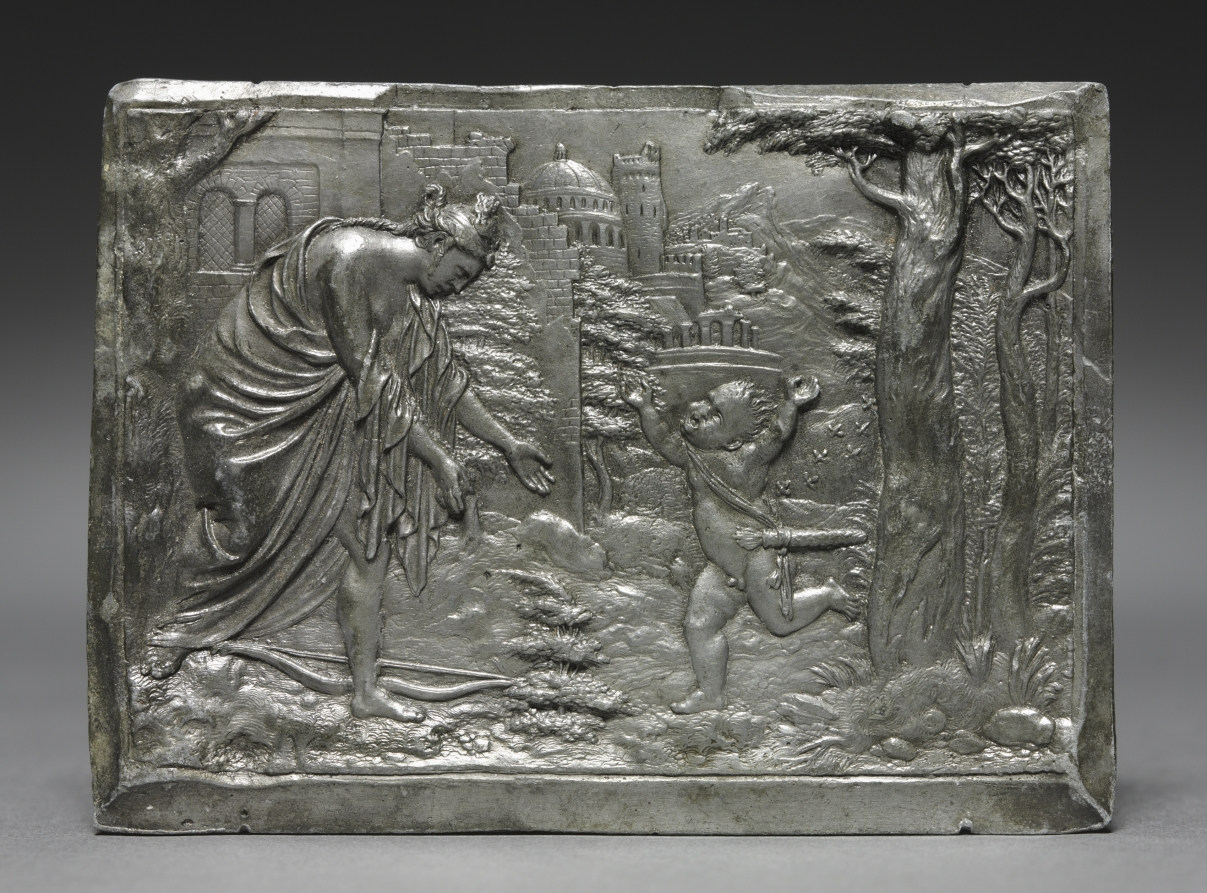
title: Cupid Complaining to Venus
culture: Germany, Nuremberg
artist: Peter Flötner (German, 1485–1546)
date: c. 1540–46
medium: lead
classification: Sculpture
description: This plaquette interprets an ancient Greek poem by Theocritus. Having been stung by a swarm of bees after attempting to steal their honey, Cupid sought refuge in the arms of his mother Venus, the goddess of love. Surprised that such small creatures could cause such great pain, Venus reminded Cupid, that like the sting of a bee, love’s arrow could be dangerous.